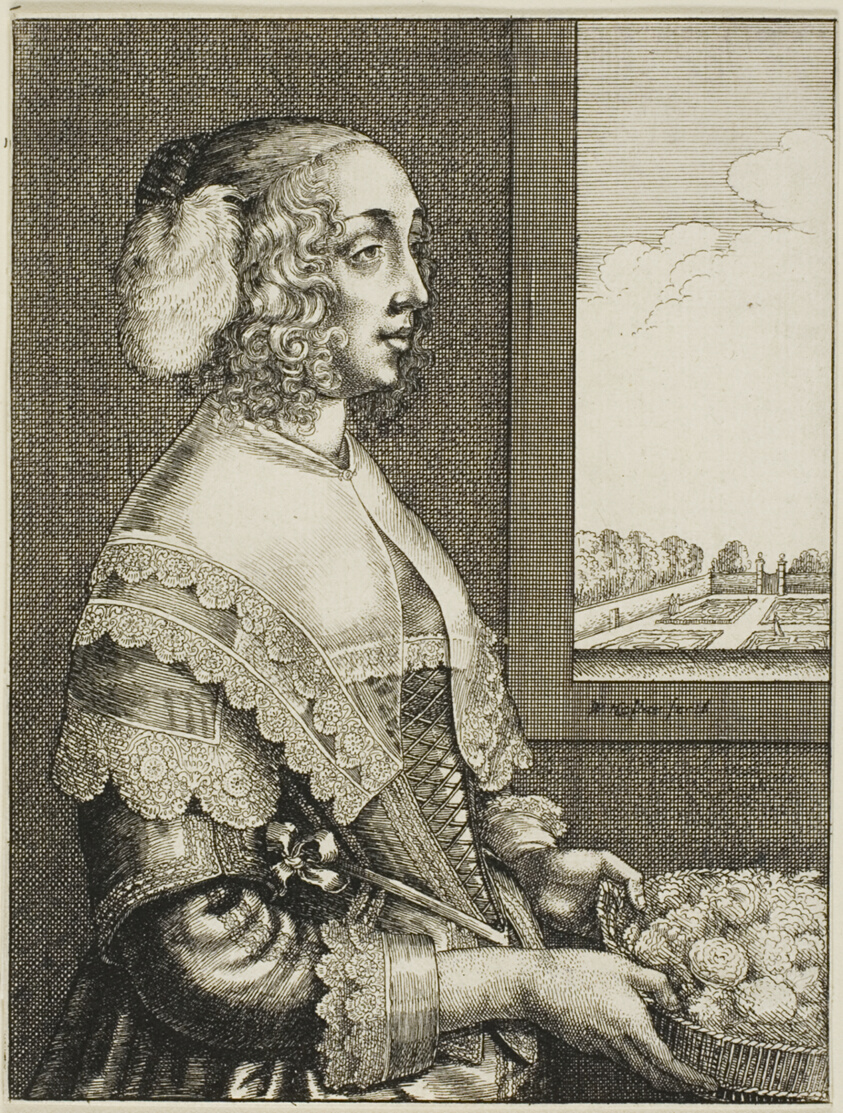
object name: Print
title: Spring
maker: Wenceslaus Hollar (Bohemian, 1607-1677)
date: 1644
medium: Etching on ivory laid paper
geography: Bohemia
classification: etching; prints and drawing; paper; print